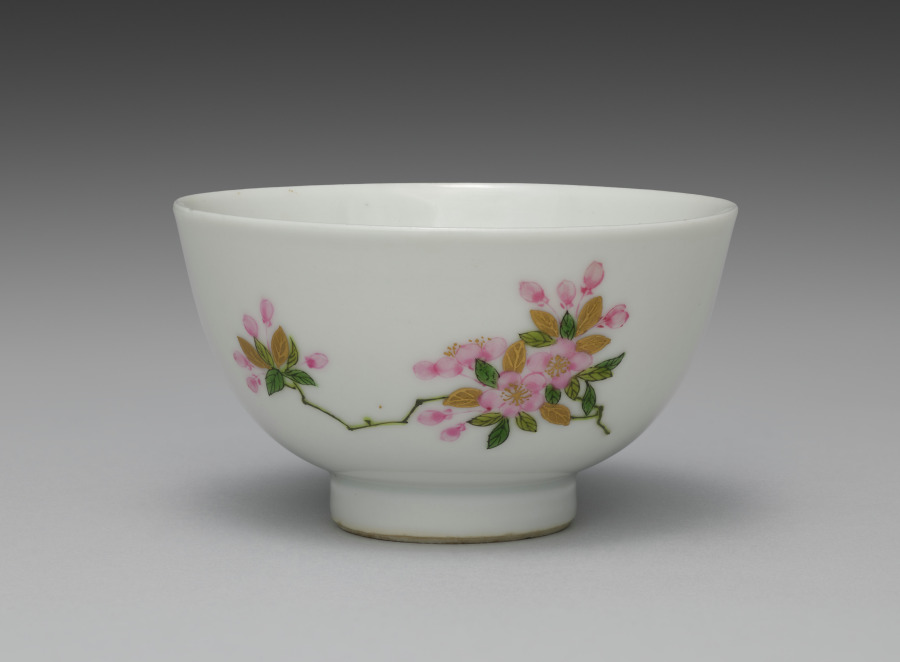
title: Teabowl from Teabowls with Peony and Crabapple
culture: Japan, Meiji period (1868–1912)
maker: Seifū Yohei III (Japanese, 1851–1914)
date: 1893–1914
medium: One from a set of five teabowls; porcelain with underglaze and overglaze color enamels and gold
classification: Ceramic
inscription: 清風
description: Overglaze color enamels are generally called iro-e (literally “color picture”) in the terminology customarily used for porcelain decoration of the Edo period. This set of teabowls is a fine example of Yohei III’s skilled use of the technique, which is identified on this set’s box lid with the alternate phrasing “porcelain with color painting” (jisaiga). Distinct from the way overglaze colors were used in Kakiemon ware from Arita, his designs and applications show a consciousness of porcelain decoration of the Qing dynasty. Here, he combines Chinese models with a sensibility taken from Kyoto ware precedents, including painting with powdered gold (kinrande). The colors used in the bowls are as follows: blue, black, gold, white, light green, green, and pink. The blue appears only inside the footring, as a double band of underglaze color. The black iron, used for stems and leaf veins, is painted over the glaze. The gold, also painted over the glaze, is used for leaves and the centers of flowers, for solid, glossy lines defining detail, or as a semimatte ground. The white of the peony flower is built up to a low relief over the glaze. Yohei has incised lines of varying widths into the pigment, carving away to the bowl’s surface, to differentiate individual petals and their rippled shapes. The light and dark greens, as well as the pink, are painted over the glaze. Of note is how Yohei has first used thinly applied lines of light green to draw the plum branch before applying the opaque iron black. For the plum buds and flowers, he has used a diluted pink with an opaque pink for outline, both over the glaze. In his later works, Yohei used pink both over and under the glaze in a manner similar to underglaze blue, and it can be challenging in some cases to discern which technique he has used. A lidded container in a private collection has a similar design but is augmented with the inclusion of white and purple magnolia blossoms. In contemplating the original decorative program of a set, of which these teabowls may have been a part, it is worth considering that perhaps not all objects included the full range of motifs. In such cases, the composition of the individual object may be best understood within the context of the extended ensemble. Here, the delicate pink plum on one side of the bowl seems slightly unbalanced with the bold white peony on the other, but when seen with other objects with the magnolia and its additional colors and shapes, it is possible to imagine a set with a complex, balanced design across multiple pieces.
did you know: Yohei III used the kinrande technique of painting with powdered gold to embellish the flowers.